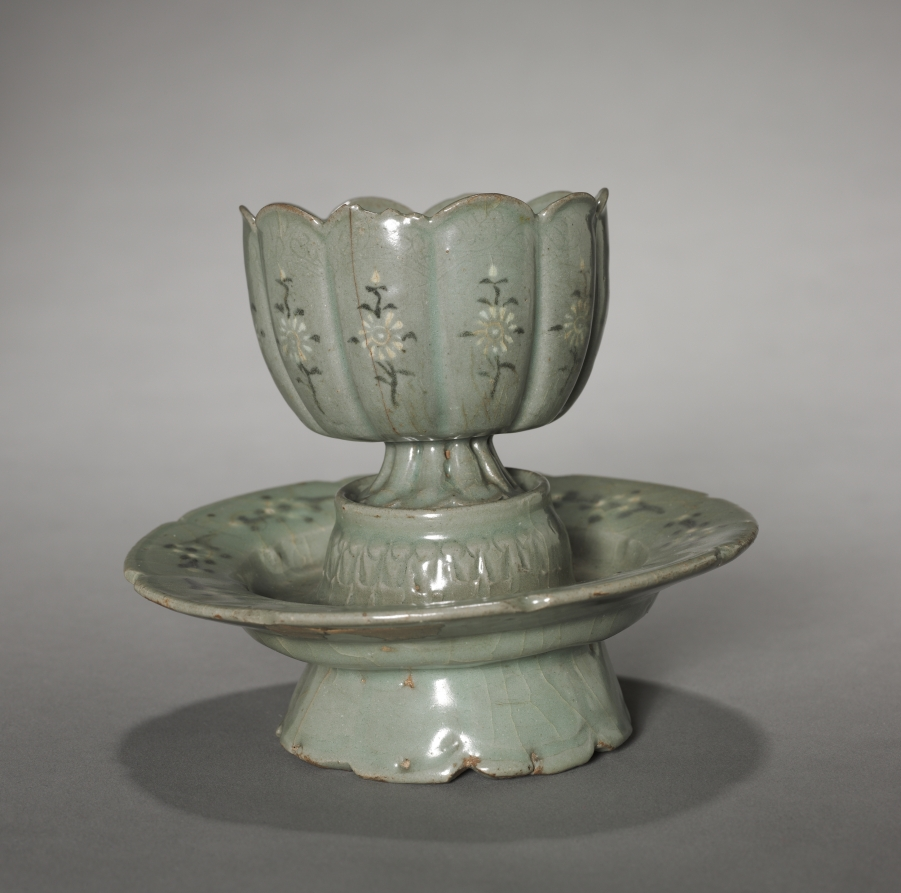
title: Floral-shaped Cup and Saucer with Inlaid Chrysanthemum Design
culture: Korea, Goryeo dynasty (918–1392)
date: 1100s-1200s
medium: Celadon ware with inlaid white and black slip decoration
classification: Ceramic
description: In Korea, chrysanthemum flowers and leaves were made into both tea and wine. Chrysanthemum wine was enjoyed during the the Double Nine Festival (the ninth day of the ninth month in the lunar calendar) praying for longevity. The flower design on the saucer is less delicate than the cup, suggesting that the cup and saucer originally were not related to each other.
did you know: Elites of the Goryeo period are known for their love of drinking tea and wine. In Korea, chrysanthemum flowers and leaves were made into both tea and wine.